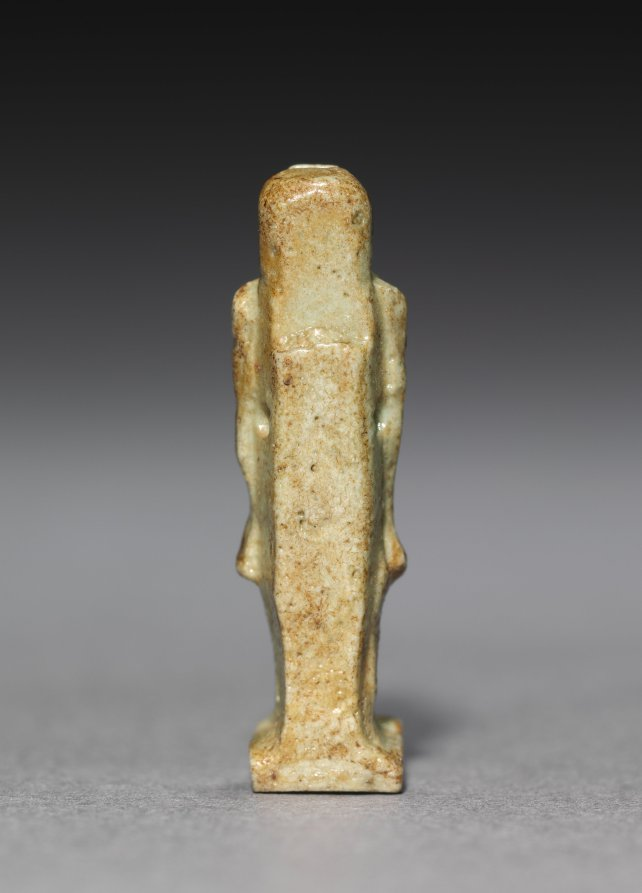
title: Amulet of Thoth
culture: Egypt, Late period (715–332 BCE), Dynasty 30–Greco-Roman period (332 BCE–395 CE), Ptolemaic dynasty (305–30 BCE)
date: 380–30 BCE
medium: gray green faience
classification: Amulets